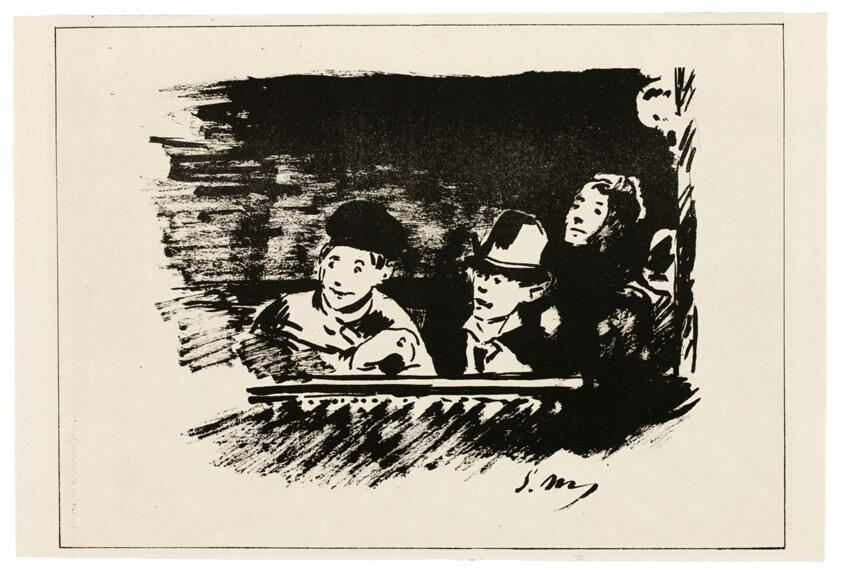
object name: Print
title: In the Upper Gallery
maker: Édouard Manet (French, 1832-1883); printed by Lefman et Compagnie (French, 19th century)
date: 1877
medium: Gillotage in black on trimmed gray wove China paper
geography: France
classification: relief etching; print; prints and drawing